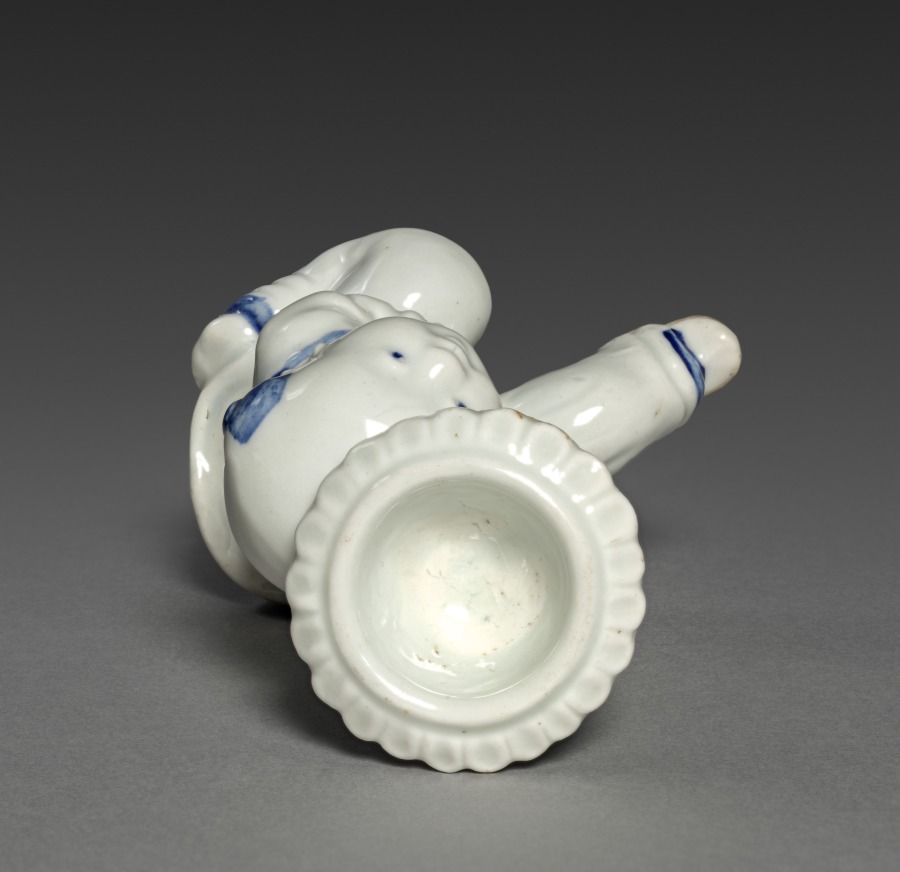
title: Kneeling Boy Holding a Vase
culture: Japan, Edo period (1615–1868)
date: 1700s-1800s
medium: porcelain, molded and carved, with underglaze blue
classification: Ceramic